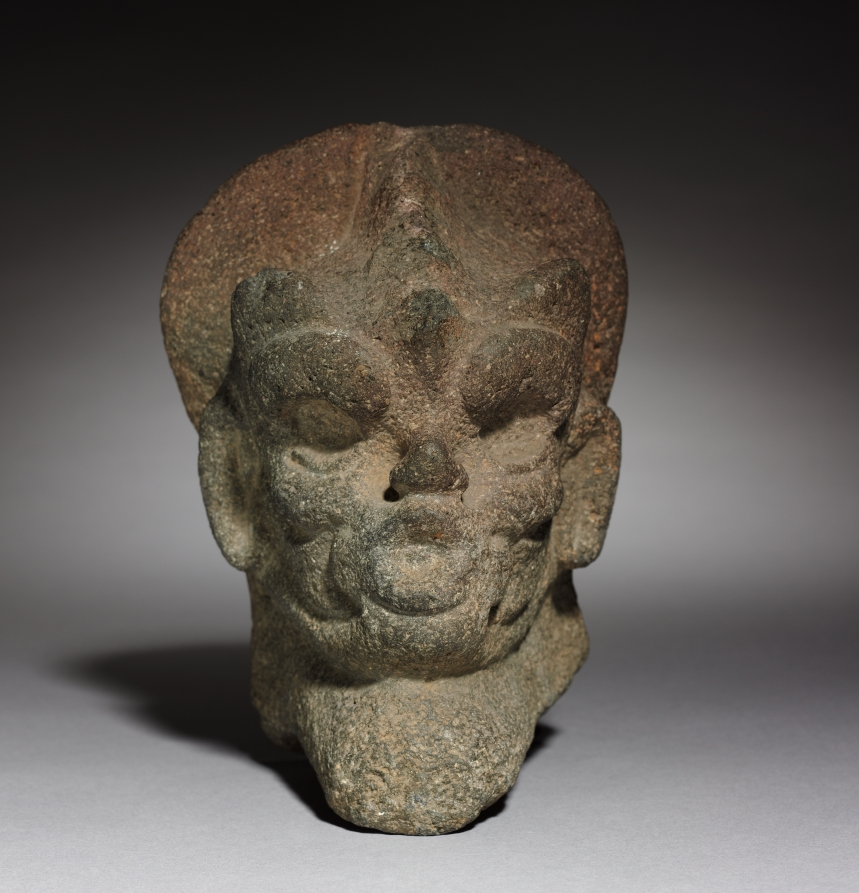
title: Head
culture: Mexico, Classic Veracruz (Totonac or Tajin)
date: 600–1100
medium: stone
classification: Sculpture